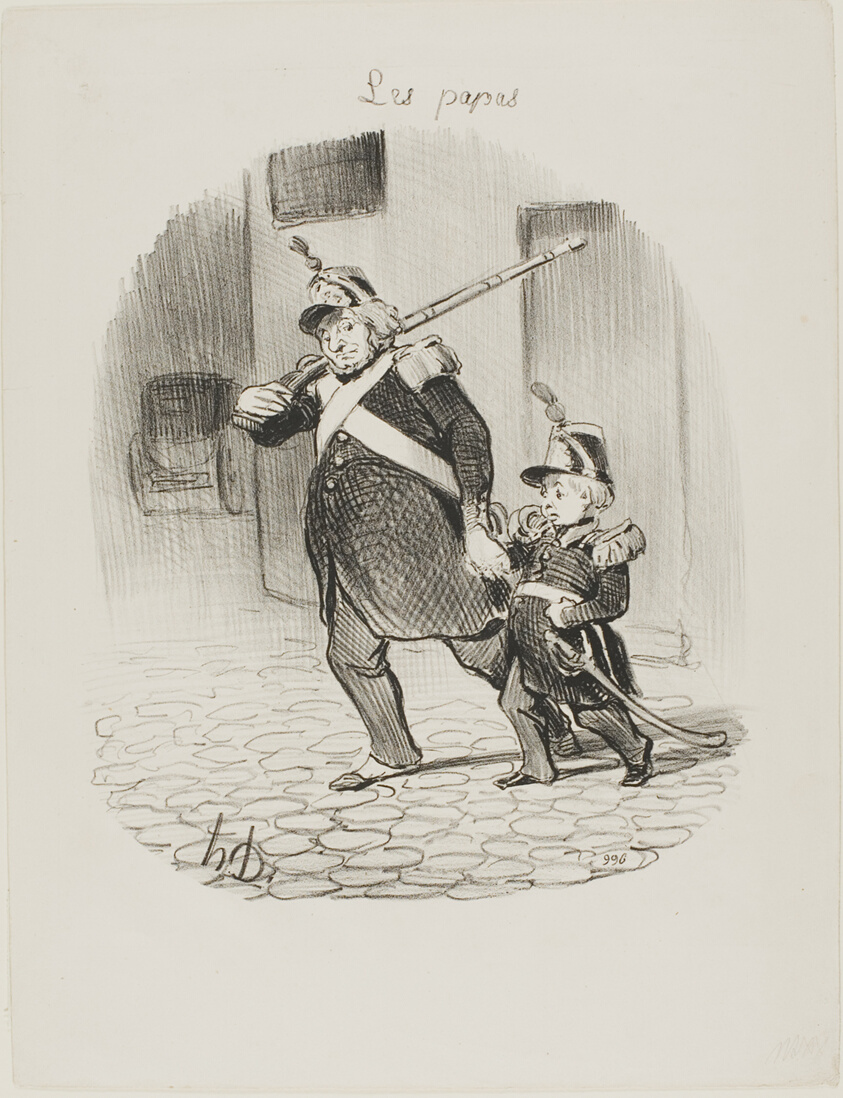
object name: Print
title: The day of the great parade, plate 6 from Les Papas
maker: Honoré Victorin Daumier; French, 1808-1879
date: 1847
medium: Lithograph in black on white wove paper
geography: France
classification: lithograph; print; prints and drawing